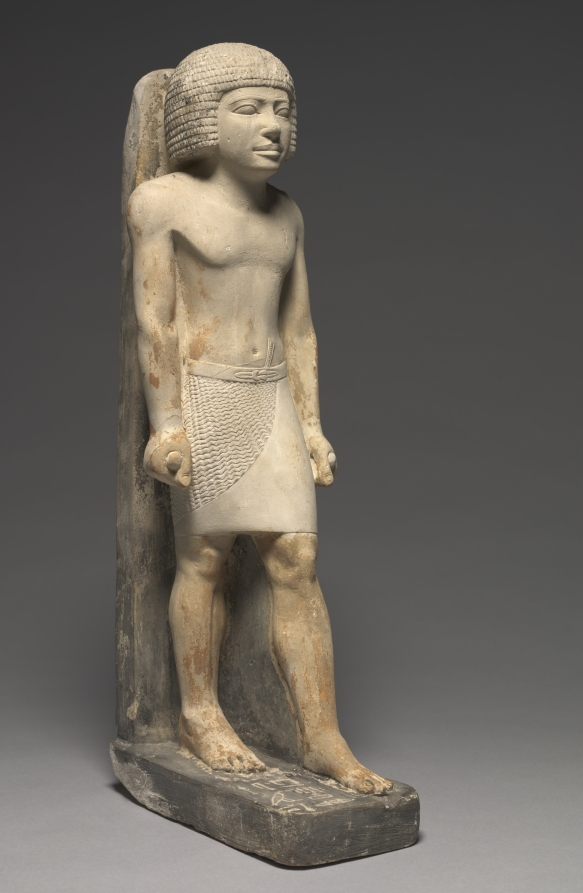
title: Striding Statue of Minnefer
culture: Egypt, Giza, Old Kingdom (2647–2124 BCE), Dynasty 5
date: c. 2377–2311 BCE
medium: painted limestone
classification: Sculpture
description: The base of this statue is inscribed with the name and title of the supervisor of palace attendants, Minnefer. He is represented as young and athletic, hands at his sides and left foot forward, the typical striding pose for male figures. To make the statue more lifelike, the flesh areas were originally painted reddish brown, the wig black, and the kilt white. This was one of four statues of Minnefer that were found in the serdab (sealed statue chamber) of his ruined mastaba (tomb) in the cemetery west of the Great Pyramid at Giza. Most Old Kingdom private statues were concealed in this way. The statue was regarded as more than just a representation. Once the proper rites had been performed, it functioned as a substitute for the deceased individual and could partake of food offerings necessary for the survival of his ka, or vital spirit.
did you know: In the Old Kingdom, wigs like the one Minnefer wears here were used to demonstrate higher social status.